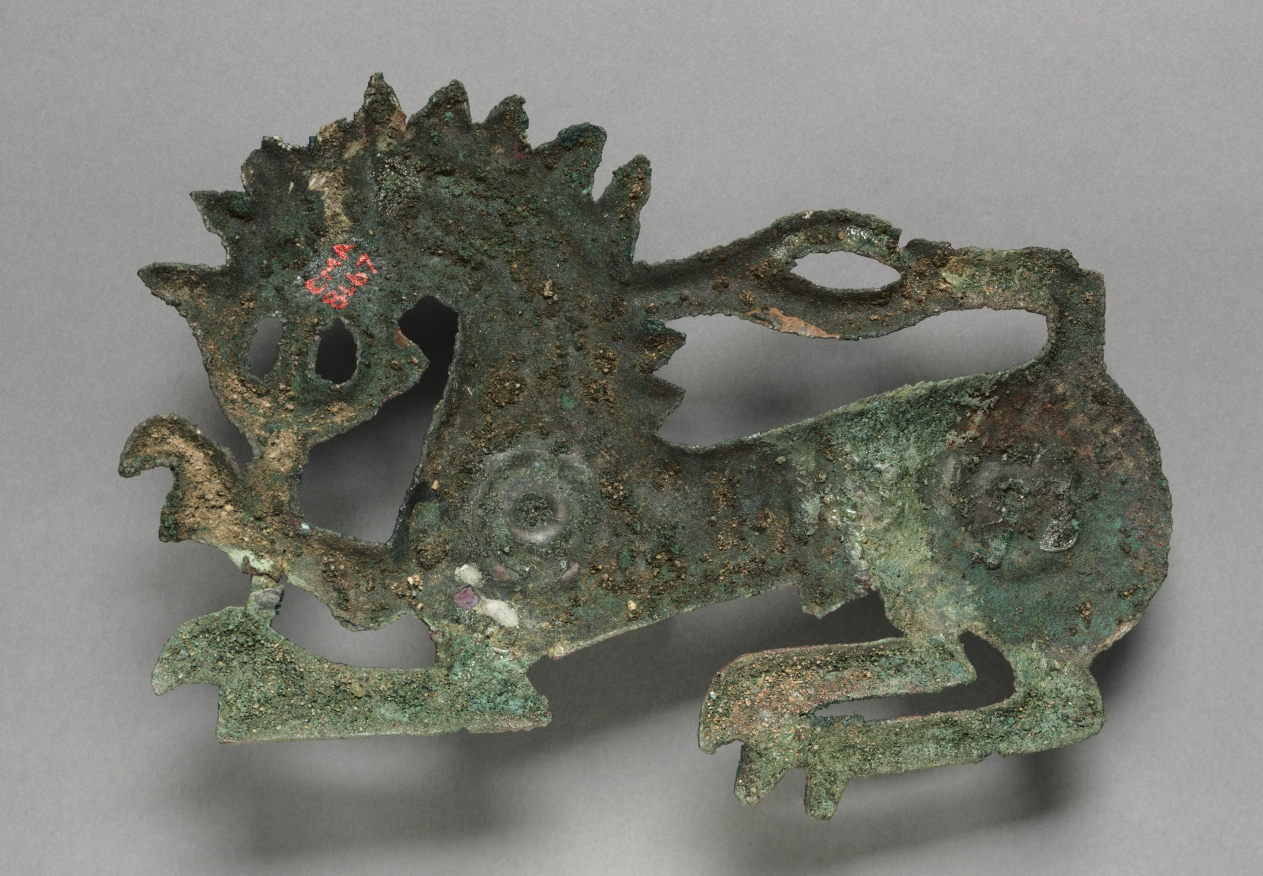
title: Lion Plaque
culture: Central Asia, Iran, Scythian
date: 1000–500 BCE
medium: bronze, repoussé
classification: Sculpture